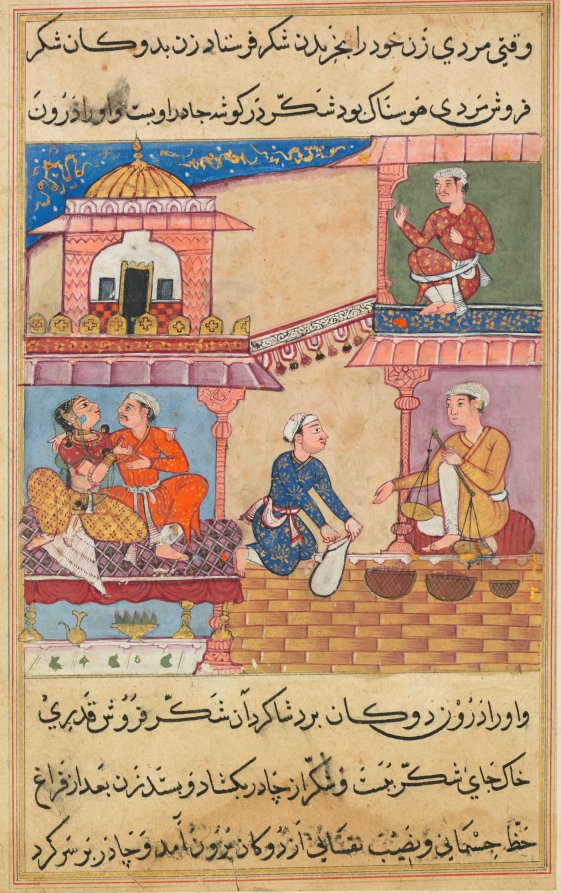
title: The merchant’s clerk replaces the sugar purchased by the philandering wife with gravel, from a Tuti-nama (Tales of a Parrot): Eighth Night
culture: Mughal India, court of Akbar (reigned 1556–1605)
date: c. 1560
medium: gum tempera, ink, and gold on paper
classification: Painting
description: While buying sugar at the market, a woman has an impromptu affair with a merchant. The two lovers embrace in the chamber on the left. Outside the chamber the merchant’s clerk, wearing blue, surreptitiously replaces the adulteress’s sugar with gravel. Unaware of the switch, she will bring the bag of gravel back to her husband, who reacts with surprise and consternation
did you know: A bowl beneath the lovers’ bed contains green pan leaves, which freshen breath when chewed.